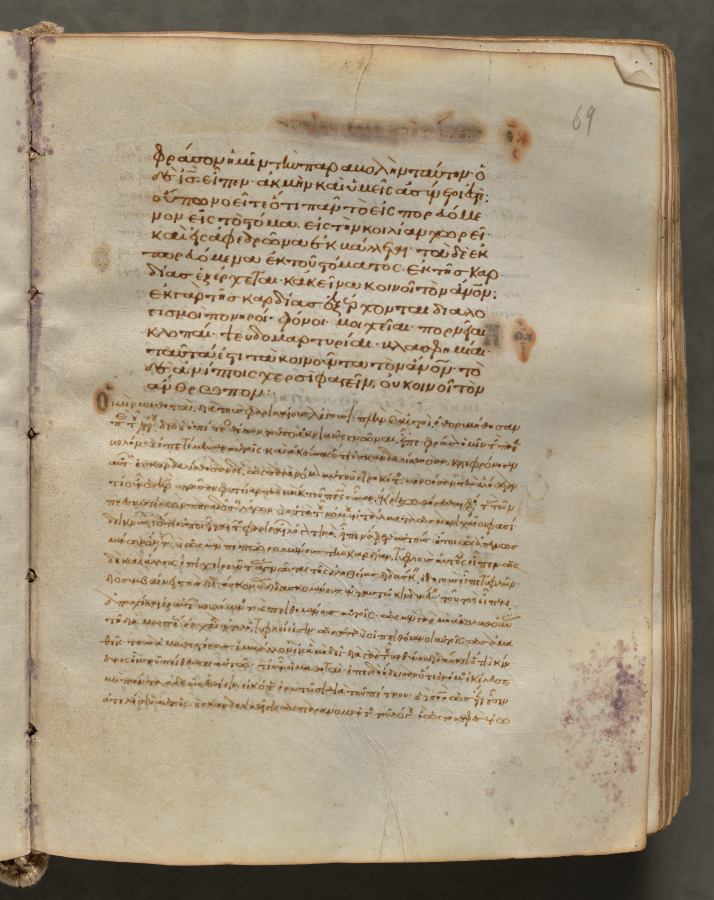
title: Text, folio 69 (recto), from a Gospel Book with Commentaries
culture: Byzantium, Constantinople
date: c. 1000–1100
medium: ink, tempera, and gold on vellum; leather binding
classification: Bound Volume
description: Each of the four gospels in this book opens on a page with brilliantly illuminated borders depicting the author of the text as well as birds-principally peacocks, symbols of the immortality of the soul-and fountains, representing the fountain of life and the salvation of the soul. This volume consists of 428 leaves with texts in Greek. Its level of sophistication suggests that it was probably written and decorated in a monastery in Constantinople.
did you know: Gospel Books were carried in procession through Byzantine churches.